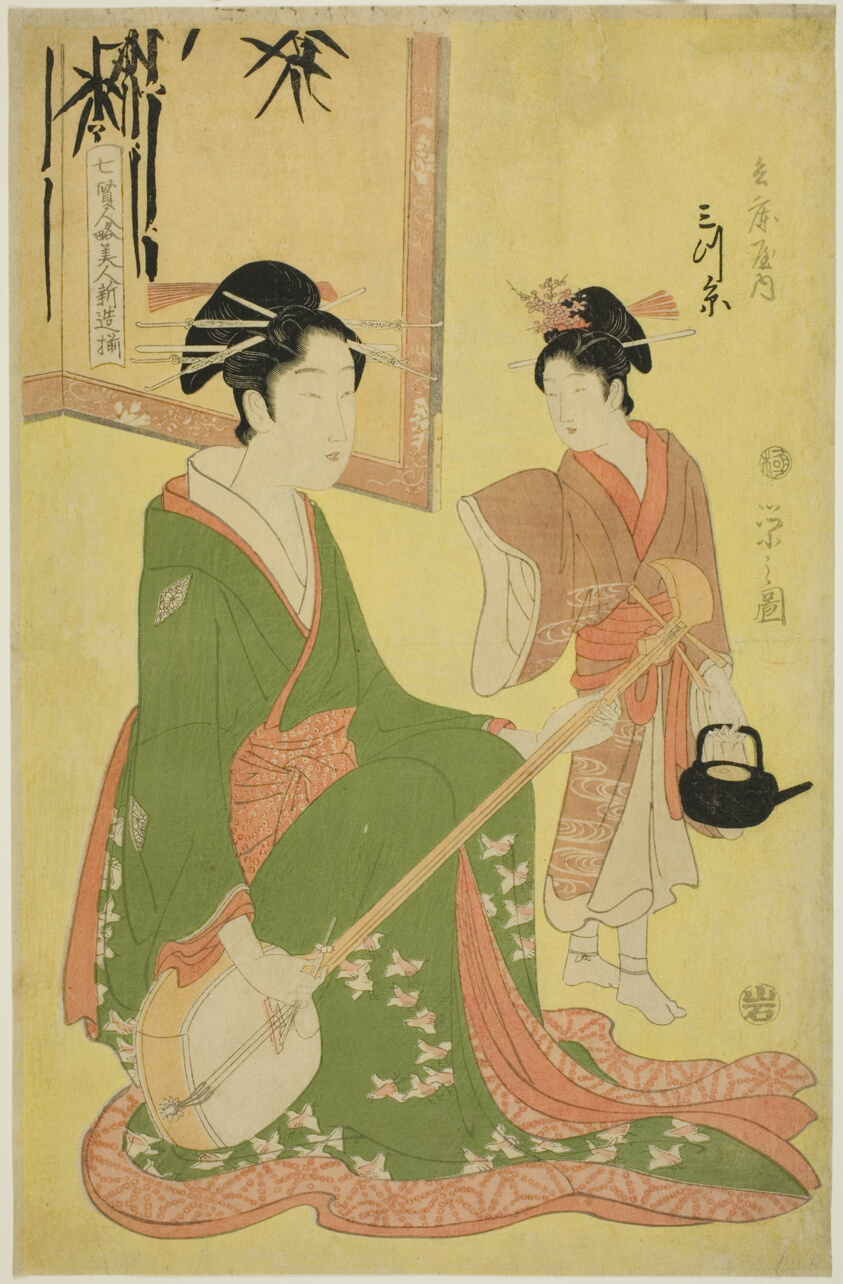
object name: Print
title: Beauties Parodying the Seven Sages - A Selection of Younger Courtesans (Shichi kenjin yatsushi bijin shinzo zoroe): Mitsuito of the Hyogoya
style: Japanese (culture or style)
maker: Chobunsai Eishi; Japanese, 1756-1829; Publisher: Iwato-Ya; Japanese, Unknown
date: c. 1793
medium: Color woodblock print; oban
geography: Japan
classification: woodblock print; print; asian art